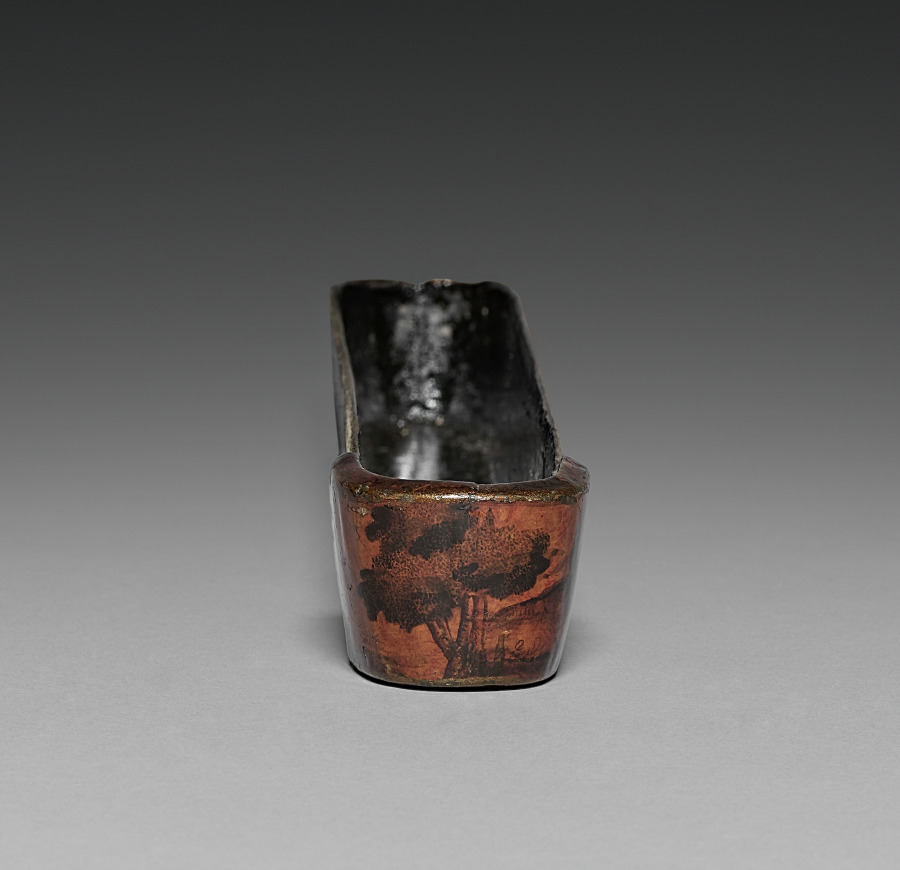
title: Pen and Ink Box (base)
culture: Iran, Qajar period (1779-1925)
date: 1800s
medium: lacquer over papier maché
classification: Lacquer